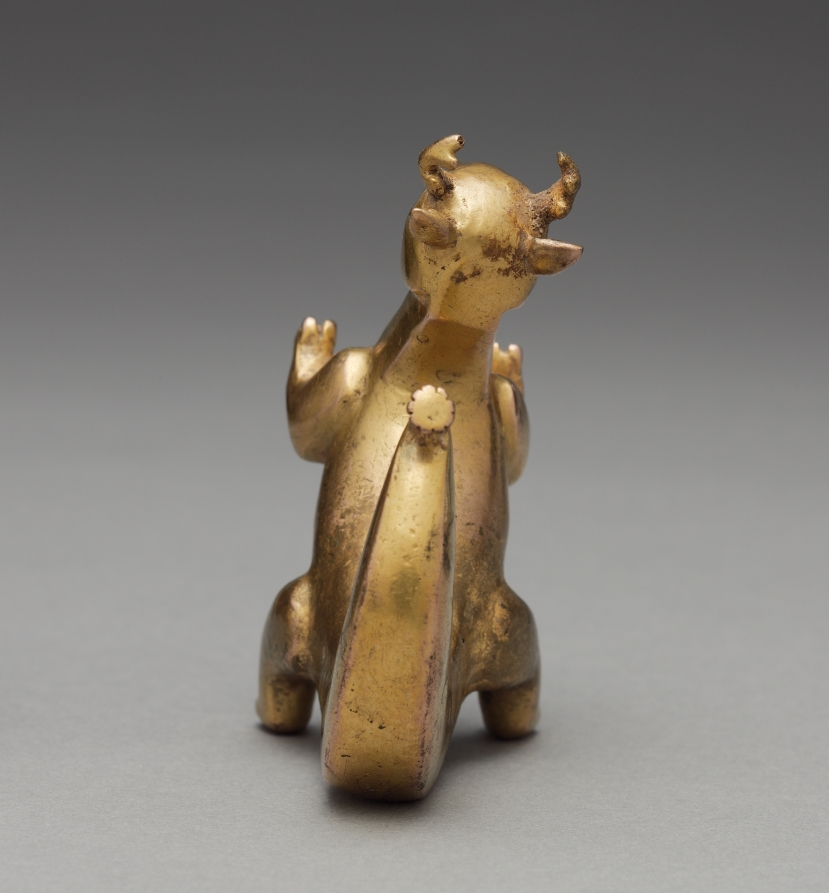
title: Pendant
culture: Panama, International style, 5th-7th century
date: 400–700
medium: cast gold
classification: Metalwork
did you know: Panning for gold was viewed as a sacred activity among the ancient inhabitants of Costa Rica and Panama.